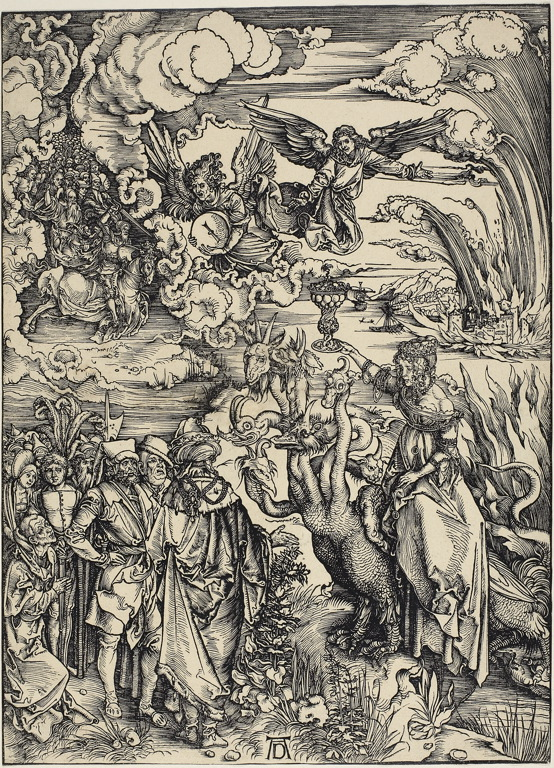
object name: Print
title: The Whore of Babylon, from The Apocalypse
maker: Albrecht Dürer (German, 1471-1528)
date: 1496–98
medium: Woodcut in black on ivory laid paper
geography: Germany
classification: woodcut; print; prints and drawing; paper